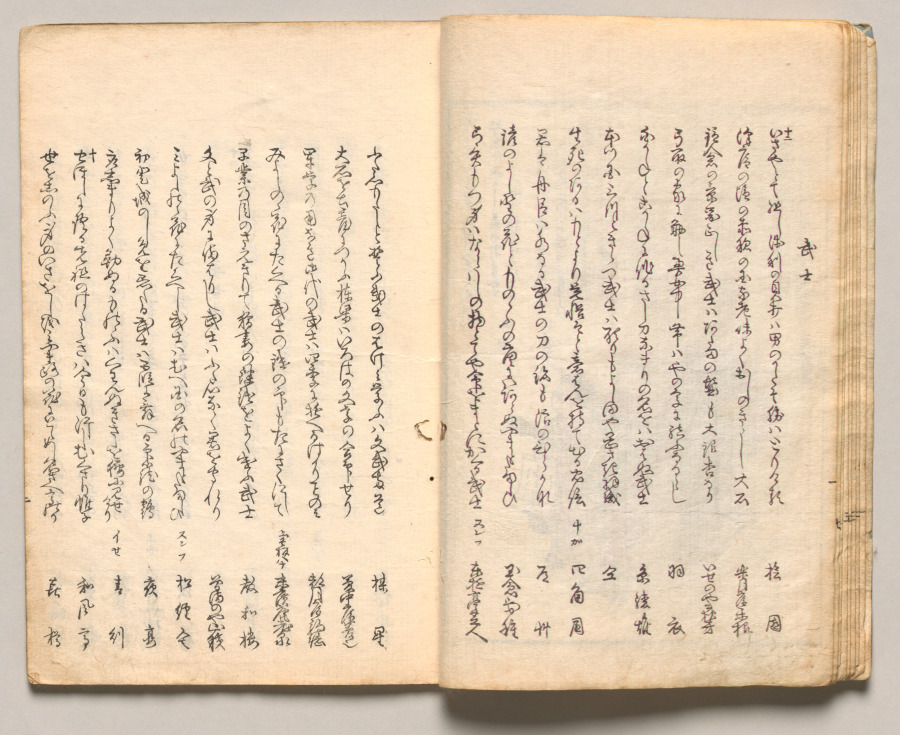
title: Spread Nine from Volume Two of People of Japan in Light Verse (Kyōka)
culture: Japan, Edo period (1615–1868)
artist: Utagawa Hiroshige (Japanese, 1797–1858)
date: 1857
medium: Woodblock-printed book; ink and color on paper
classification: Bound Volume